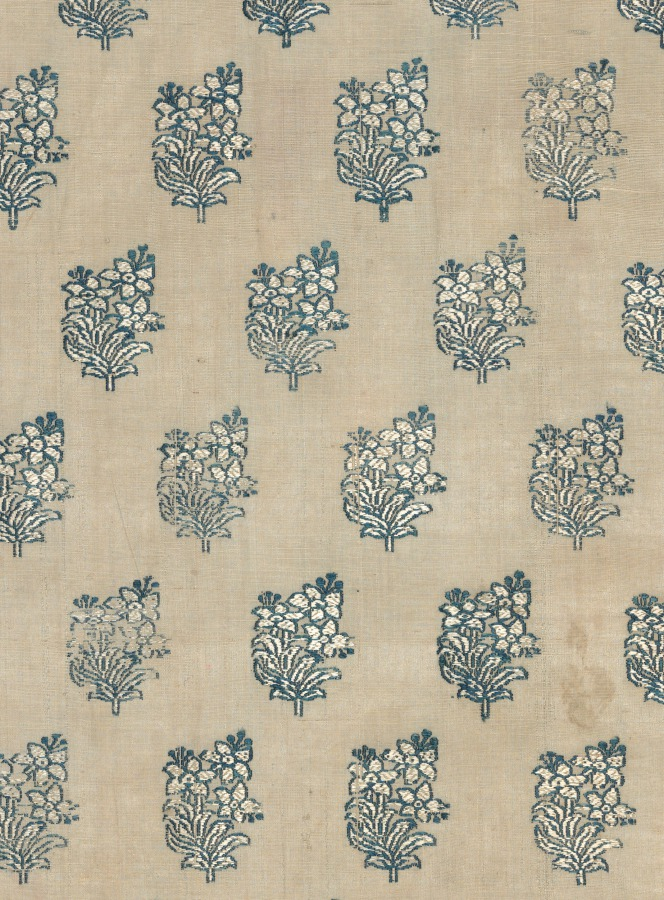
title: Brocade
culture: India, Surat, 18th-19th century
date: 1700s - 1800s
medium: brocade, "himru"; cotton and silk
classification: Textile